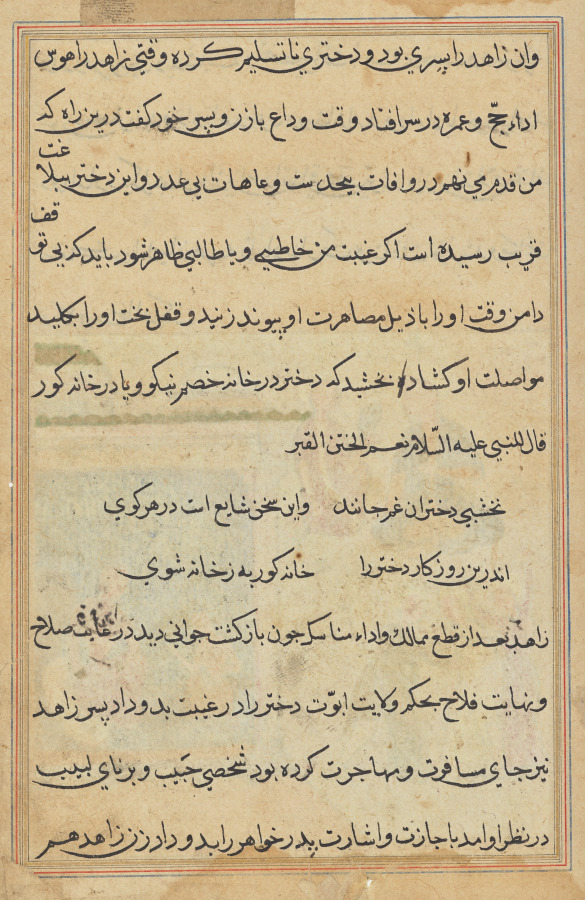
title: Page from Tales of a Parrot (Tuti-nama): text page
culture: Mughal India, court of Akbar (reigned 1556–1605)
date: c. 1560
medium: gum tempera, ink, and gold on paper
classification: Painting